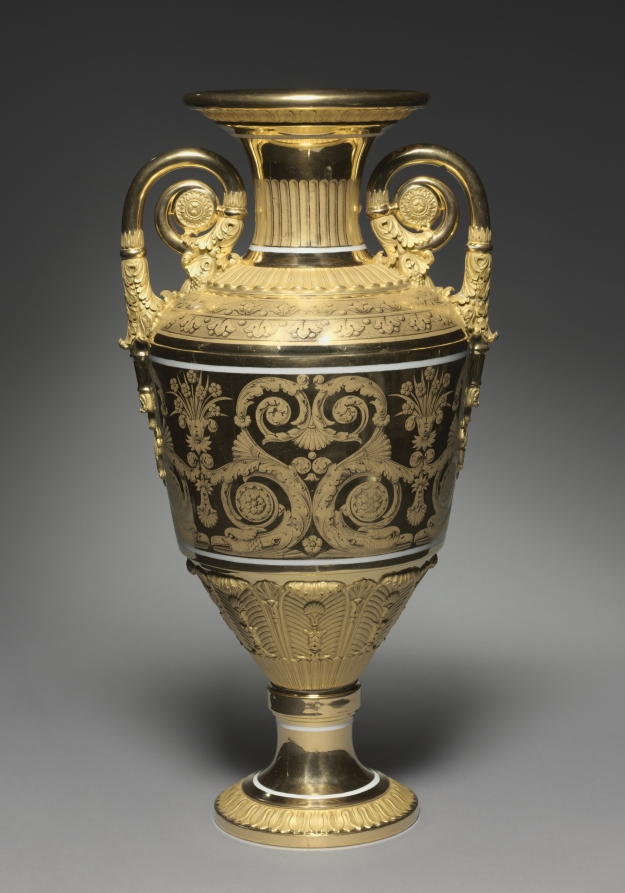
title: Vase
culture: Russia, St. Petersburg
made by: St. Petersburg Imperial Porcelain Factory (Russian)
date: c. 1820–1830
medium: gilt porcelain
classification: Ceramic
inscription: inscribed: "Moreau" in gold near lip.